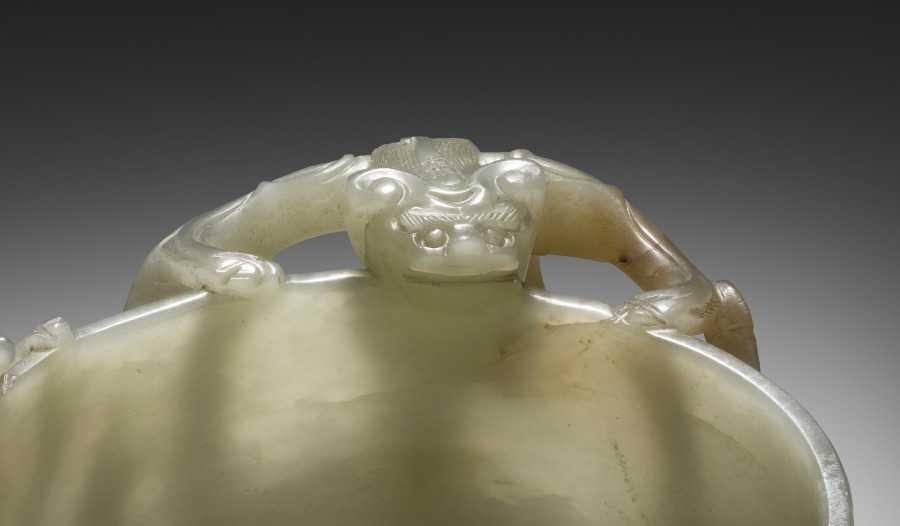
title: Cup with Dragon Handles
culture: China, Qing dynasty (1644-1911), Kangxi reign (1662-1722)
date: 1662–1722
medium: Pale gray-green white jade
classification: Jade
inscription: 萬壽長春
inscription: 壽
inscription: 子剛造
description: Three dragons, auspicious symbols for good fortune, grasp the rim of this bowl. A large shou (longevity) character is visible on the outside wall. Drinking cups with dragon handles were elite luxuries. The yellowish-white color and refined techniques are characteristic of Suzhou workshops that served the court, scholar-officials, and the merchant class. The optimistic attribution to Lu Zigang (late 1500s), a jade master recorded to have been active in Suzhou, suggests that its maker used the master’s name to attract wealthy clients eager to demonstrate their refined taste and connoisseurship.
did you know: Auspicious inscriptions on the base and front of the jade cup convey wishes for longevity.